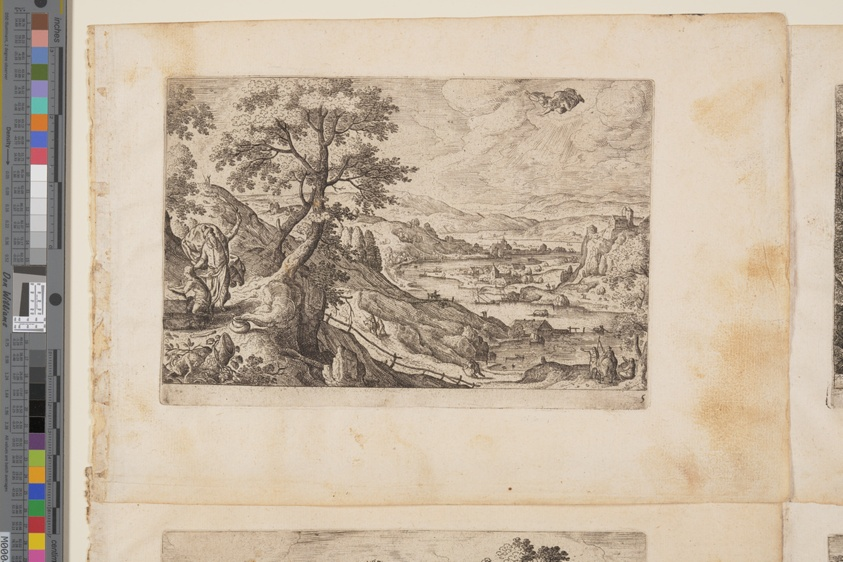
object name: Print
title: Plate 5, from Landscapes with Scenes from the Old and New Testament and Ovid’s Metamorphoses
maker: Hans Bol (Flemish, 1534–1593); published by Philip Galle (Flemish, 1537–1612)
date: 1574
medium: Etching on ivory laid paper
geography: Flanders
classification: print; paper; prints and drawing; etching